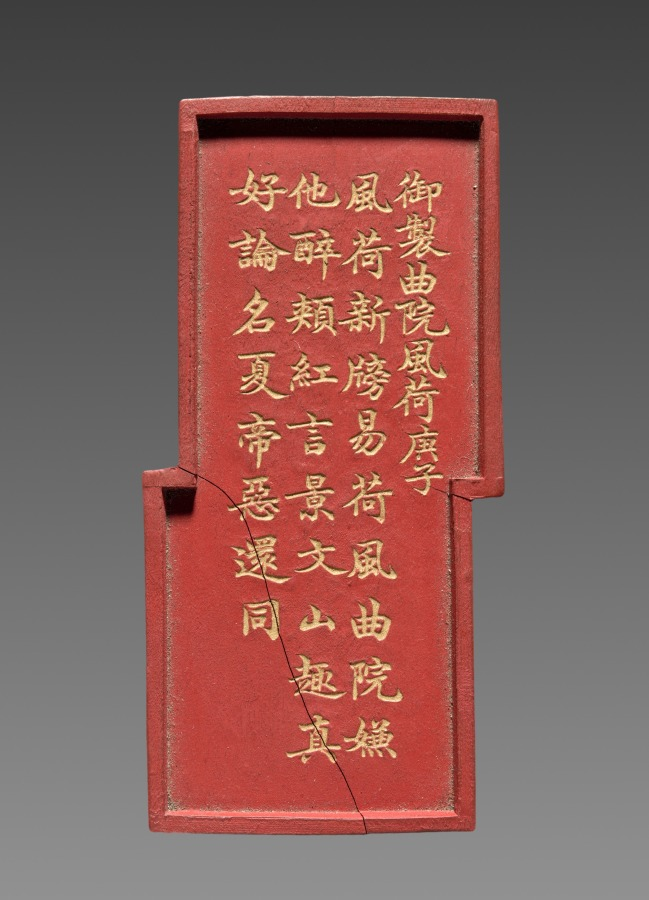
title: Ink Stick from an Imperially Commissioned Set of Ink Stick with Images and Poems of Famous West Lake Sites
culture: China, Qing dynasty (1644–1911), Qianlong reign (1736–95)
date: 1780–94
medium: Molded ink in red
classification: Miscellaneous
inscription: 乾隆年製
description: This is one of ten ink cakes of different shapes and colors stored in an exquisite lacquer box. Each is inscribed in gold with a poem by the Qianlong emperor, praising the ten famous sights of the Westlake in Hangzhou, near Shanghai. The Westlake is famous for its natural beauty; it was a favorite imperial destination and remains a tourist attraction today. Ink cakes (also called ink sticks) are dissolved with the addition of water and ground on the surface of a flat stone into liquid ink for painting and calligraphy. The precious ink cakes here, however, have never been used.